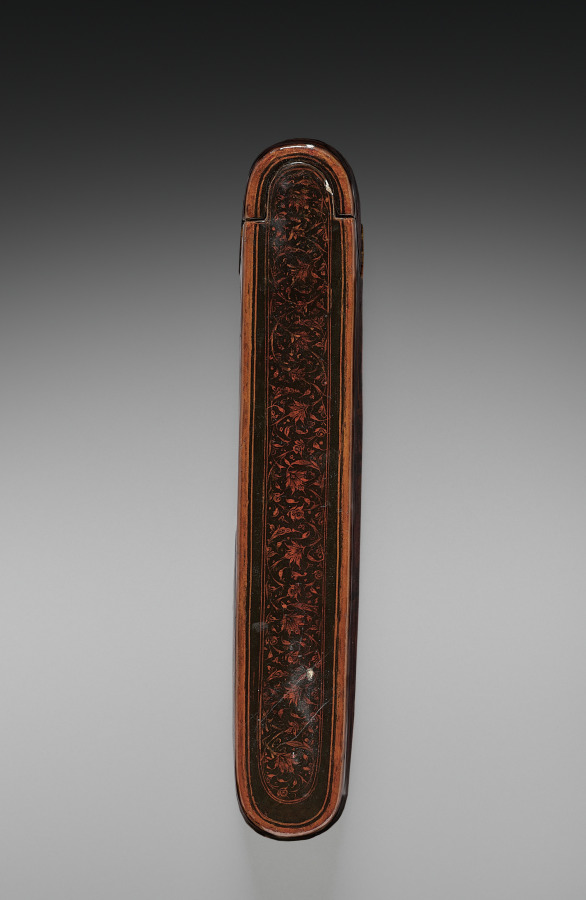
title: Pen and Ink Box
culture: Iran, probably Isfahan, Safavid period (1501–1722)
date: 1667–98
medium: Varnished lacquer and opaque watercolor over papier-mâché, ink, and copper alloy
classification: Lacquer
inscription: 1109